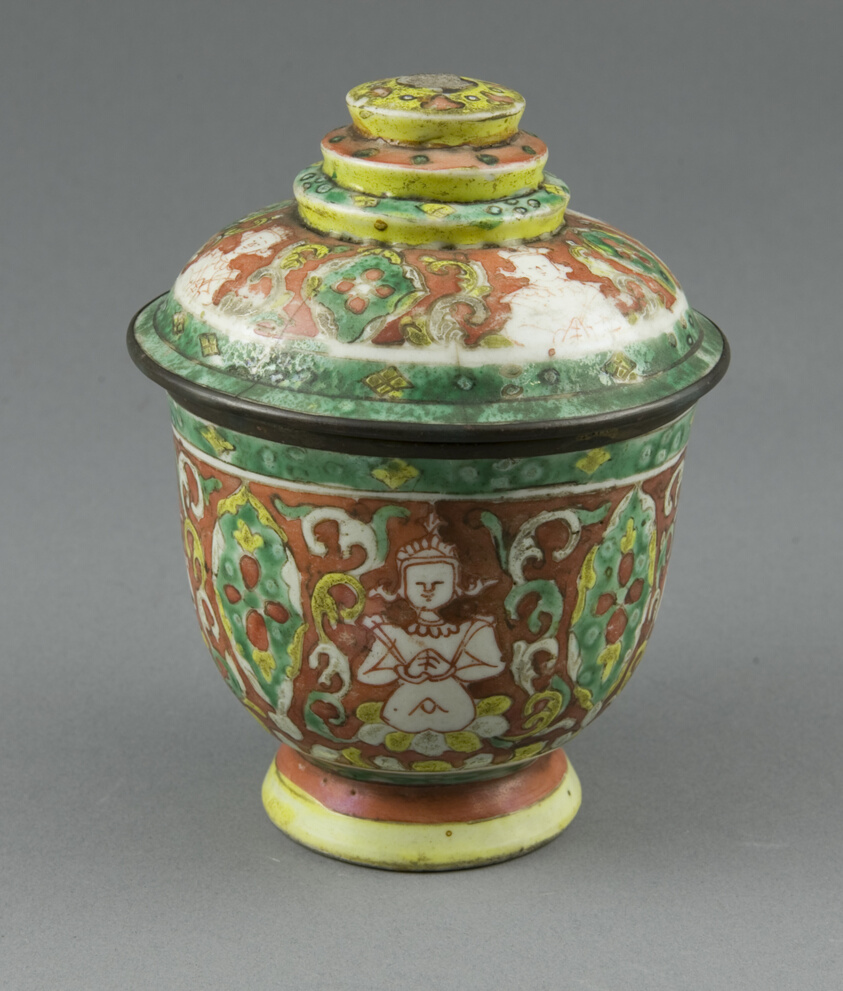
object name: Decorative Arts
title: Bencharong (Five-Colored) Ware, Jar with Tiered Cover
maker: China, for the Thai Market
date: 19th century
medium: Porcelain painted in overglaze polychrome enamels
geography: China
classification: porcelain; asian art; ceramics; decorative arts